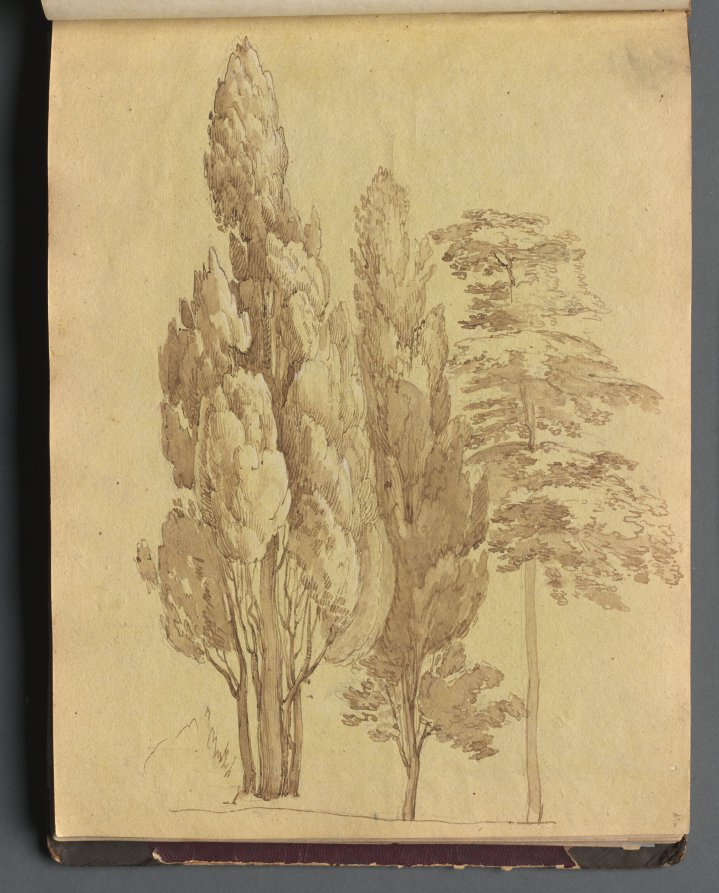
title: Album with Views of Rome and Surroundings, Landscape Studies, page 15a: Trees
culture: Germany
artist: Franz Johann Heinrich Nadorp (German, 1794–1876)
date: c. 1830s-70s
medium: brown wash with grahite and white heightening on yellow paper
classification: Bound Volume